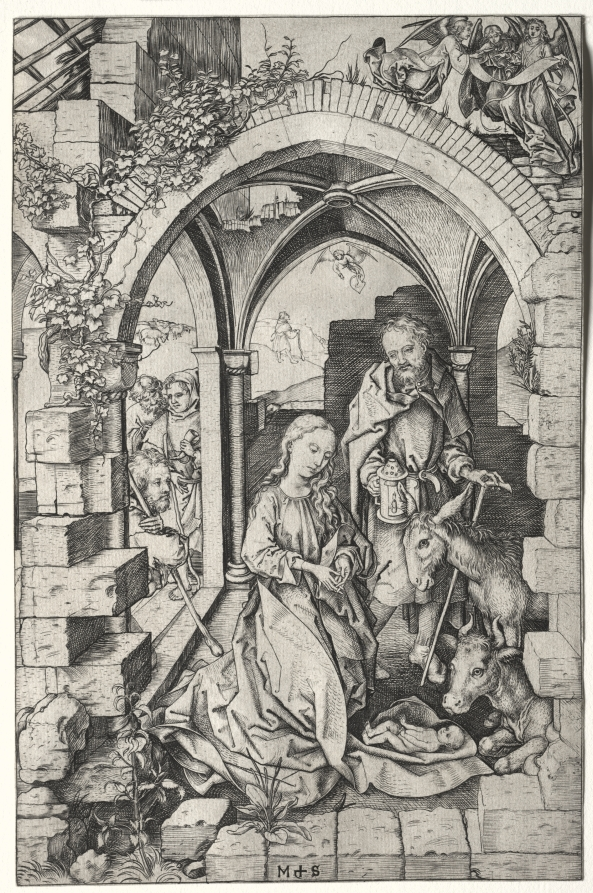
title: The Nativity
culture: Germany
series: Life of the Virgin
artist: Martin Schongauer (German, c. 1450–1491)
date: 1470–75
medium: engraving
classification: Print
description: This print of the Nativity is the first of a set of four engravings considered to be an incomplete series of episodes of the Life of the Virgin, which also includes the Adoration of the Magi (1942.1070), The flight into Egypt (1954.260), and The Death of the Virgin (1956.744). Here, Martin Schongauer portrayed the humble and private joy of the Virgin Mary in prayer as she adores the holy infant, who lies on the ground on a corner of her cloak. Joseph gazes tenderly at his wife and holds a lantern. The holy family is joined by the ox and the donkey. The scene takes place in the ruins of a vaulted Gothic edifice, from the top of which jubilant angels sing. From the arched entrance, three shepherds witness the nativity. In the distance, an angel heralds the miraculous birth to one of the shepherds.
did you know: In this example, Martin Schongauer's skill with the engraver's burin is on display in the extensive vocabulary of marks that delineate stones, foliage, vines, garment folds, human hair, and animal fur.